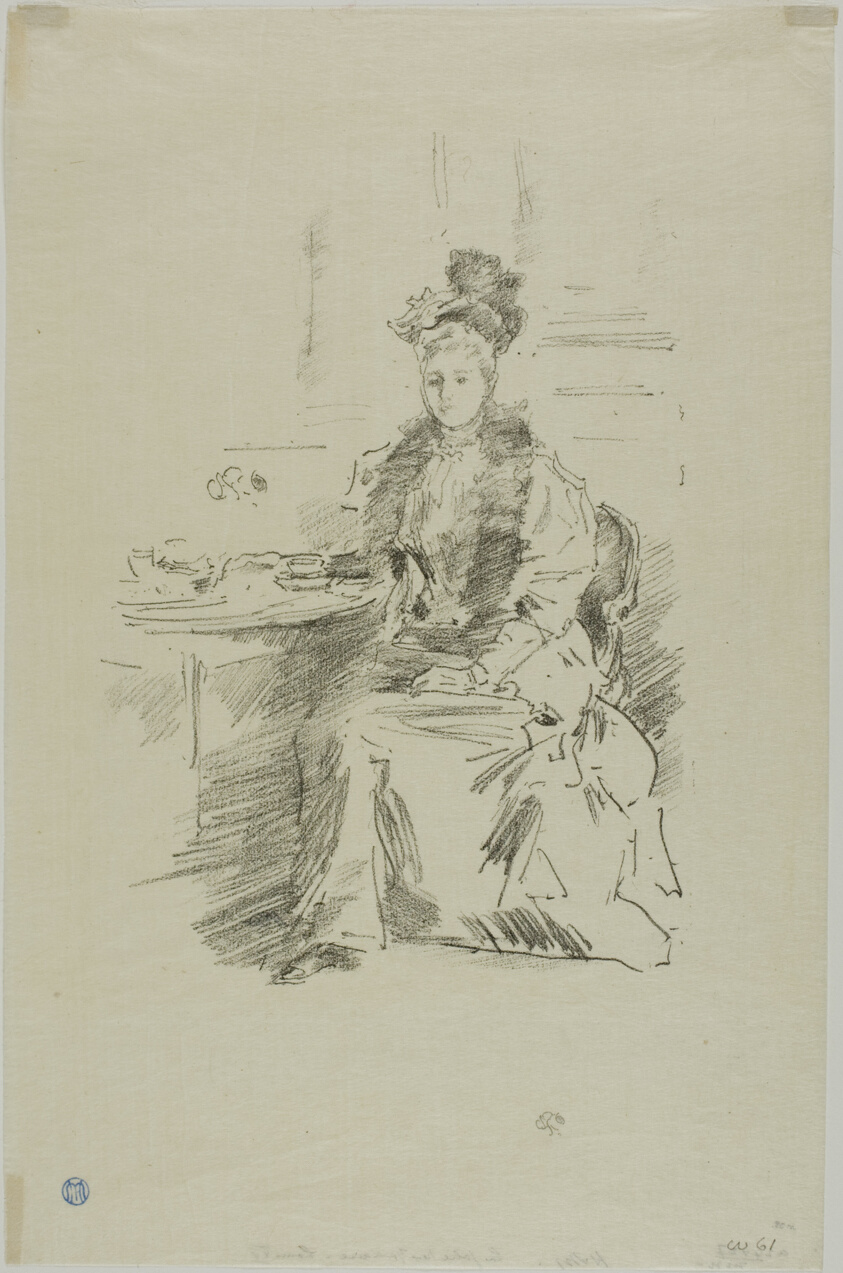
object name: Print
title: La Jolie New Yorkaise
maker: James McNeill Whistler (American, 1834-1903)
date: 1894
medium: Transfer lithograph in black on cream Japanese paper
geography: United States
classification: transfer lithograph; lithograph; print; prints and drawing; paper